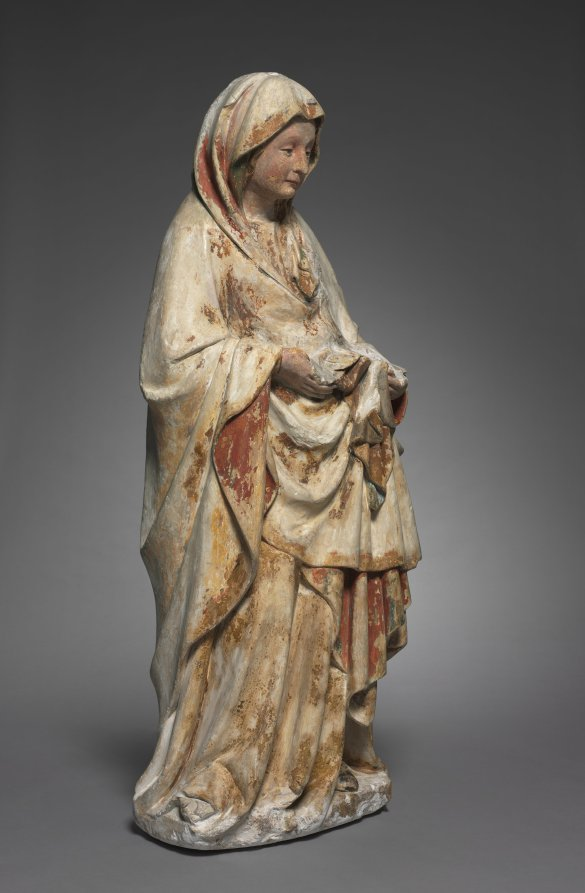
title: Standing Virgin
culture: Netherlands, active Dijon, 15th century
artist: follower of Claus de Werve (Netherlandish, 1380–1439)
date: c. 1440–1450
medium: painted and gilded limestone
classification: Sculpture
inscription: inscriptions on reverse.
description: This standing Virgin now lacks the child she once cradled in her left arm. The sculpture may have been damaged in the French Revolution by falling onto its face. It was carved from soft white limestone of a type known to be quarried at Asnières-lès-Dijon, near Champmol. The figure recalls many of the hallmarks of the style of Claus de Werve, a Netherlandish artist active at the court of Burgundy. The Virgin has a sweet, round face that is also smooth and fleshy, her eyelids droop pensively and she is engulfed in rich voluminous draperies that cascade in deep folds. This sculpture should be seen as a charming reflection of de Werve’s many Virgin and Child groups. It was probably carved by a follower closely acquainted with his style.